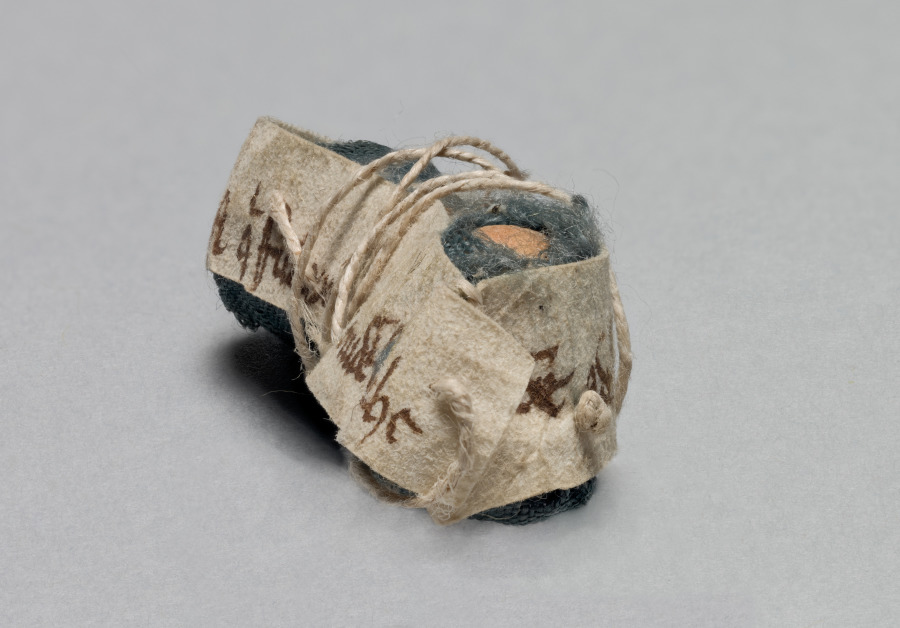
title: Relic of St. Adelaide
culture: Germany, Lower Saxony?, Romanesque period, 11th century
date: c. 1045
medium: bone, plain weave blue silk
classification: Metalwork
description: This relic is housed inside of the portable altar commissioned by Countess Gertrude of Brunswick, one of the Guelph Treasure’s earliest and most sumptuous objects.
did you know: This bone is thought to belong to a finger (metacarpal) although the curve is too prominent for a human. An exact determination can't be made without unwrapping it.